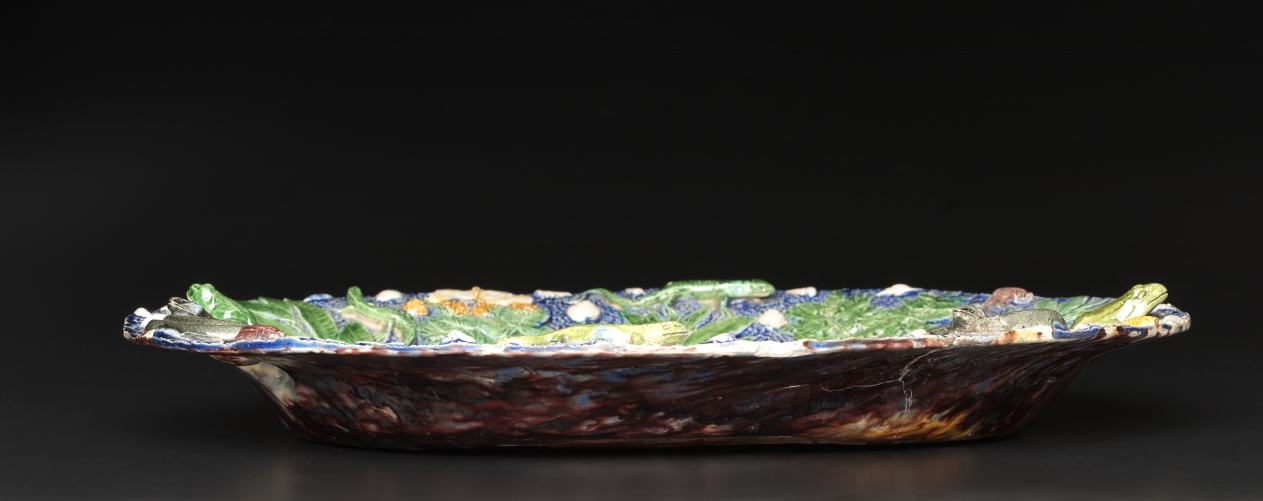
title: Rustic Platter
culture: France, 16th century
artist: manner of Bernard Palissy (French, 1510–1589)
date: late 1500s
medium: lead glazed earthenware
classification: Ceramic